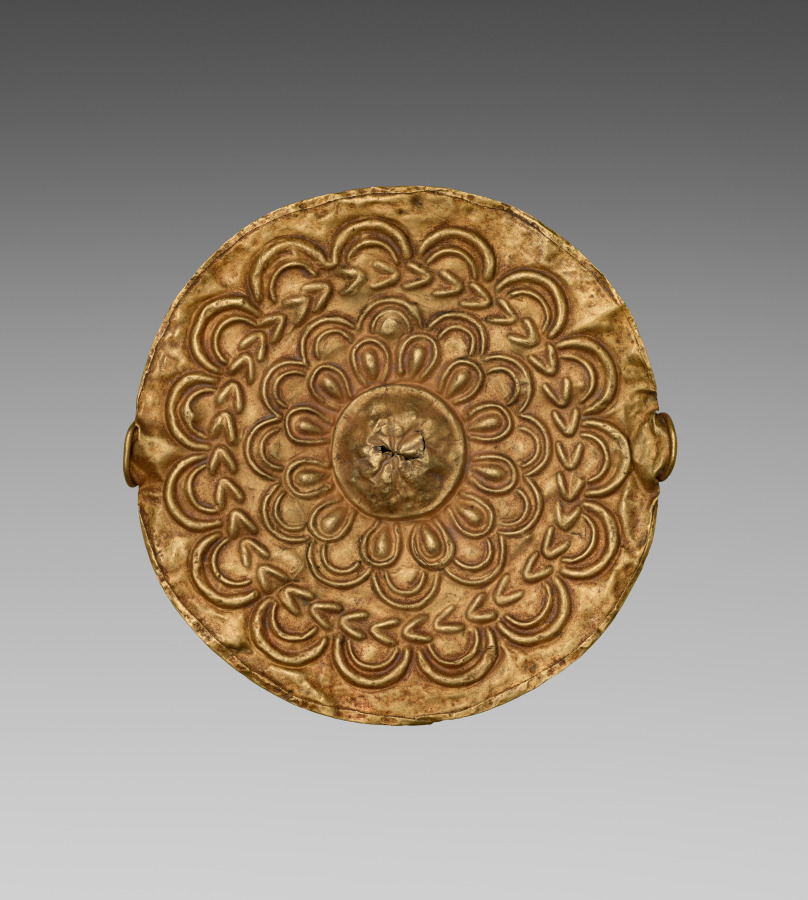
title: Disk Pendant (akrafokɔnmu)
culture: Africa, West Africa, Ghana, Asante Empire/Kingdom, probably Kumasi, member of the goldsmiths’ guild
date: 1800s, before 1896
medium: Gold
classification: Jewelry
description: Gold discs dangling on the chests of Akan state officials and elites showed their rank and duties. Worn by these akrafo (“soul people”) since the 1800s, they are often linked to kradware, officials who represent and purify (“wash”) the king’s soul. To make them, goldsmiths cast or flattened gold. Muslim North African gold coins likely inspired their form and material, while concentric water rings influenced their composition. This small disc is a typical pre-colonial example: asantehene (king) Prempeh I reportedly owned this disk. The British emptied his treasury after deposing and exiling him in 1896. Gold ornament making ceased until 1924; court officials now wear large discs.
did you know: Akan goldsmiths were organized into guilds, a kind of specialized group of artisans.